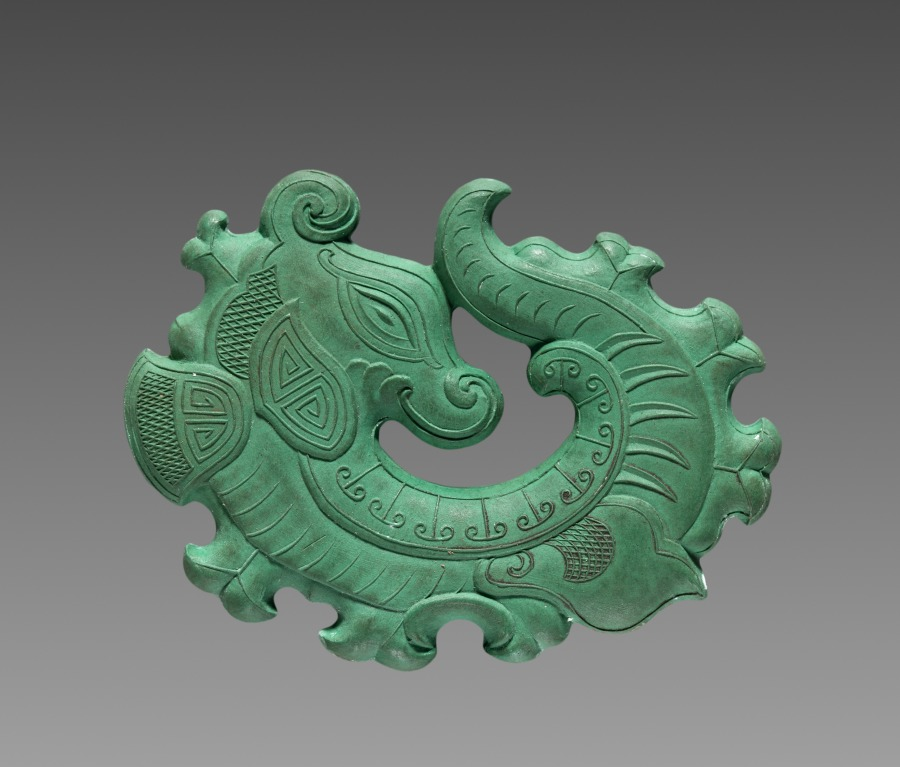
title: Box with Ink Cakes: Green Ink Cake in Shape of Coiled Dragon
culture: China, Qing dynasty (1644-1911), Jiaqing reign (1795-1820)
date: 1795–1820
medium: Molded ink in green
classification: Miscellaneous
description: Ink cakes (also called ink sticks) are dissolved with the addition of water and then ground on the surface of a flat square stone into liquid ink for painting and calligraphy. The precious ink cakes here, however, have never been used. The inscription on the side of the blue ink cake says that the set was commissioned by Chen Huai, Governor of Jiangxi Province.